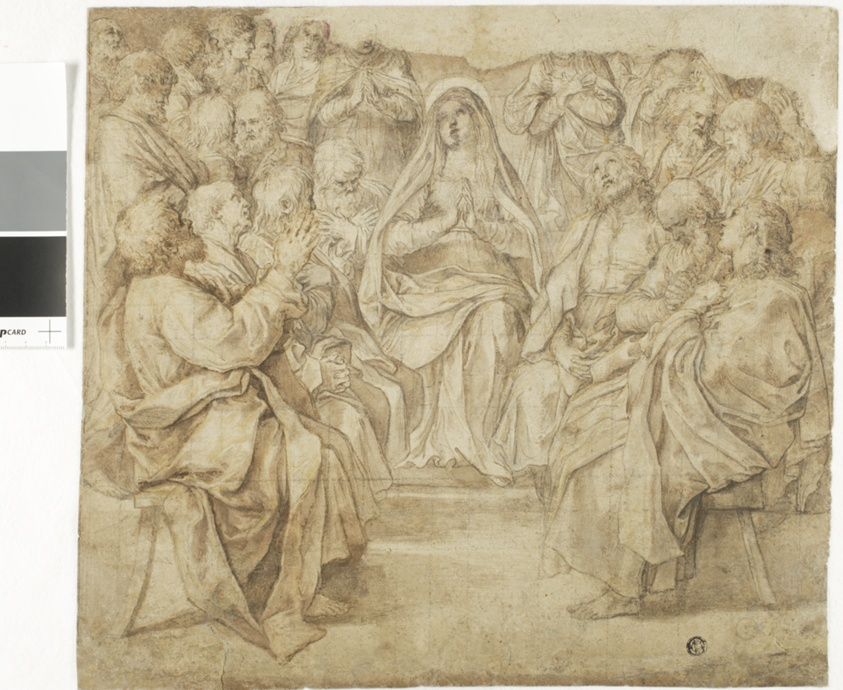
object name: Drawing and Watercolor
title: Descent of the Holy Spirit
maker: After Guido Reni; Italian, 1575-1642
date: after 1607/08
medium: Pen and brown ink, with brush and brown wash, heightened with gold paint, over black chalk, on brown laid paper, squared in black chalk, laid down on board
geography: Italy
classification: pen and ink drawings; drawings (visual works); prints and drawing